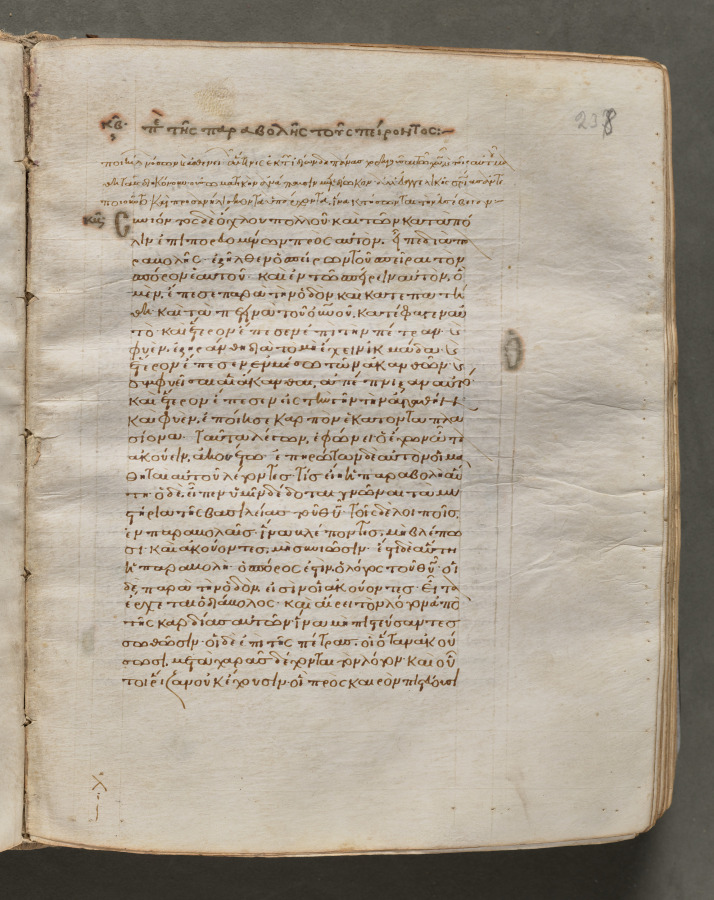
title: Text, folio 238 (recto), from a Gospel Book with Commentaries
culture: Byzantium, Constantinople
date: c. 1000–1100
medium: ink, tempera, and gold on vellum; leather binding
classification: Bound Volume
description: Each of the four gospels in this book opens on a page with brilliantly illuminated borders depicting the author of the text as well as birds—principally peacocks, symbols of the immortality of the soul—and fountains, representing the fountain of life and the salvation of the soul. This volume consists of 428 leaves with texts in Greek. Its level of sophistication suggests that it was probably written and decorated in a monastery in Constantinople.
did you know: Gospel books were carried in procession through Byzantine churches.